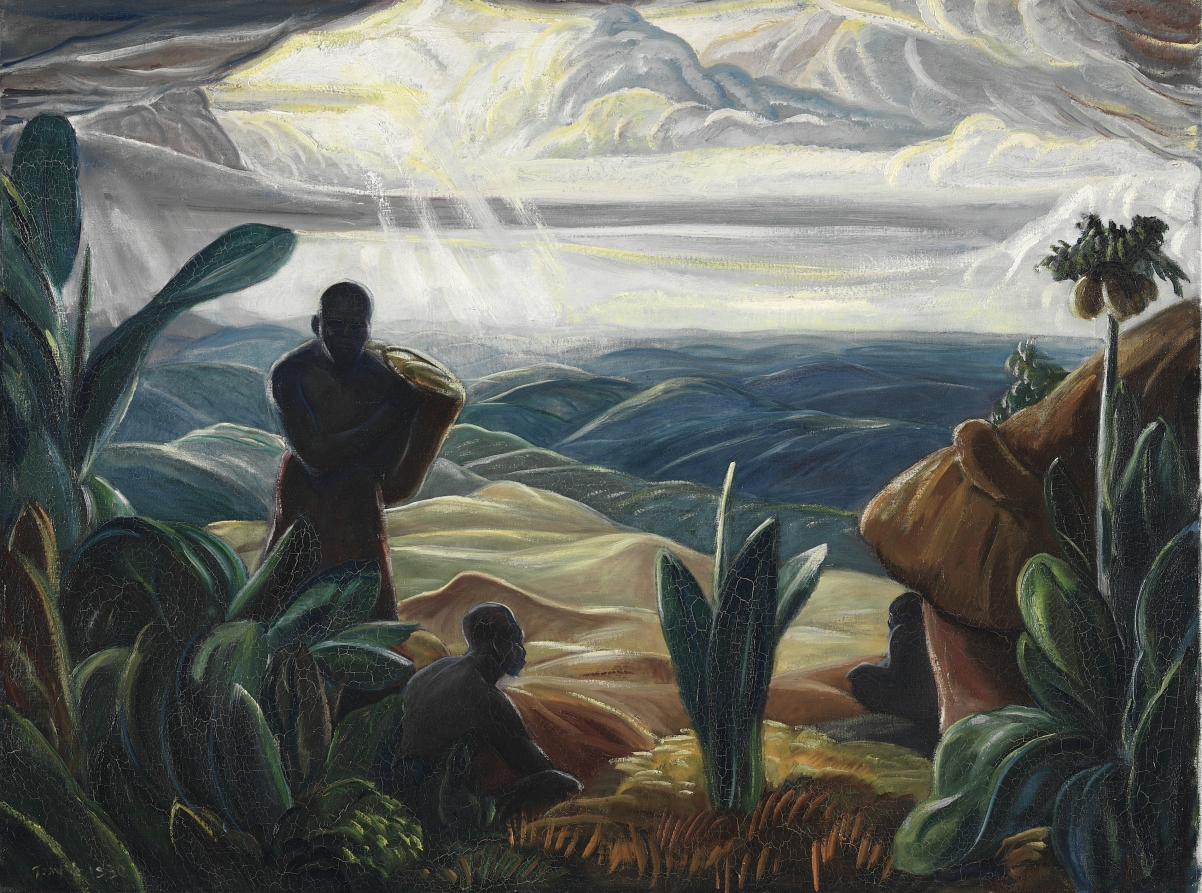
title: My First View of the Congo Forest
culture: America, Ohio, Cleveland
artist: Paul B. Travis (American, 1891–1975)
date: 1930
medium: oil on canvas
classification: Painting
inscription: signed lower left: Travis, 1930